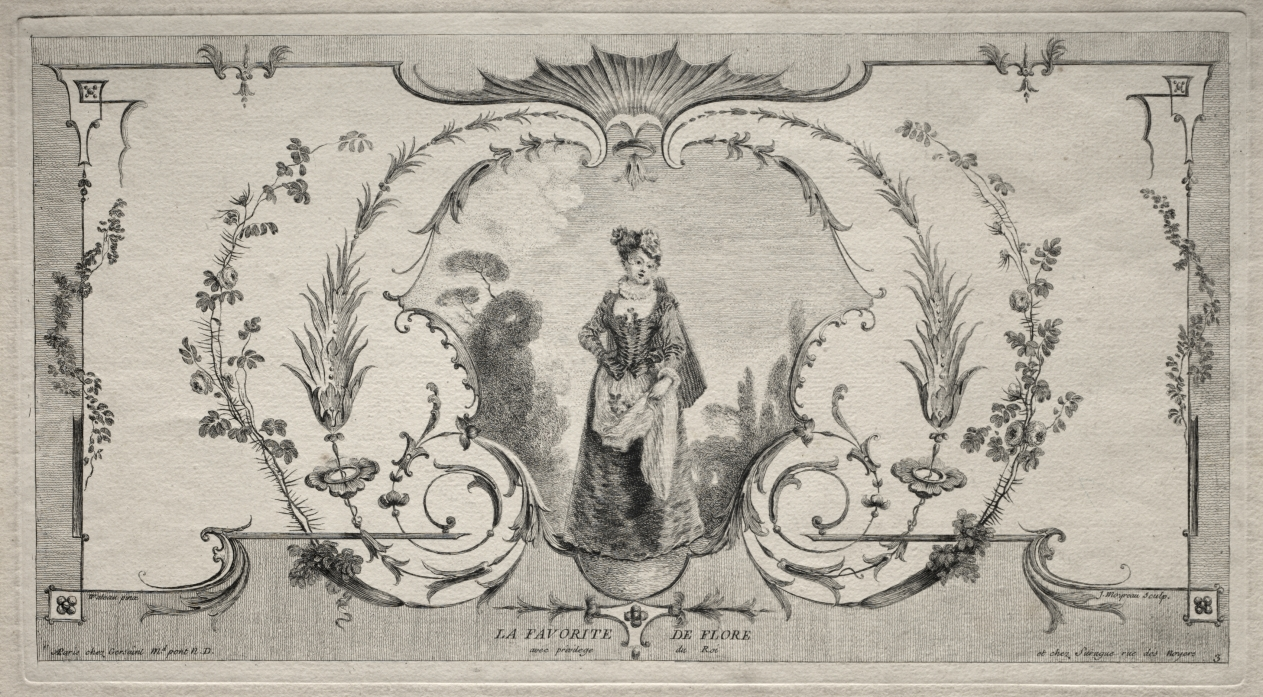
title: The Favorite of Flora, Arabesque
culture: France, 18th century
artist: Jean Moyreau (French, 1690–1762)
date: c. 1729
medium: engraving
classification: Print